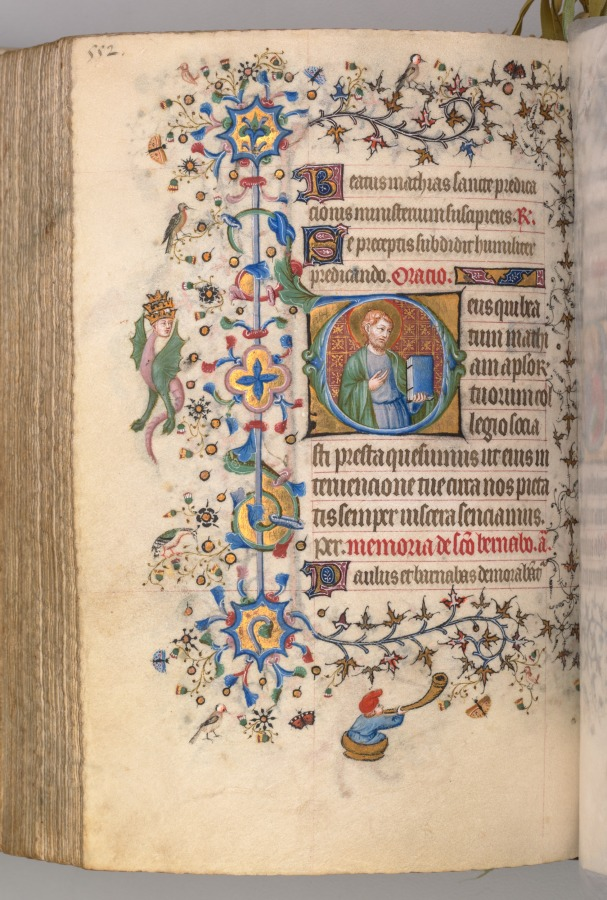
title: Hours of Charles the Noble, King of Navarre (1361-1425): fol. 270v, St. Mathias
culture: France, Paris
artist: Master of the Brussels Initials and Associates (French)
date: c. 1405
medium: ink, tempera, and gold on vellum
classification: Bound Volume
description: This precious volume was obviously highly prized by its owner, the French-born King of Navarre, who had his coat of arms painted on no less than twenty folios. Rather than directly commissioning this manuscript from a specific workshop, it seems that Charles the Noble acquired his book of hours -- perhaps ready-made for the luxury market -- while on a trip to Paris in 1404-05. A collaborative effort, six painting styles are evidenced within the pages of this codex, those of two Italians, two Frenchmen, and two Netherlanders. The painter who was responsible for the planning and decoration of the book, and who produced seventeen of the large miniatures, was a Bolognese artist known as the Master of the Brussels Initials. His principal assistant, responsible for most of the borders, was a Florentine who signed his name "Zecho" da Firenze on folio 208 verso.